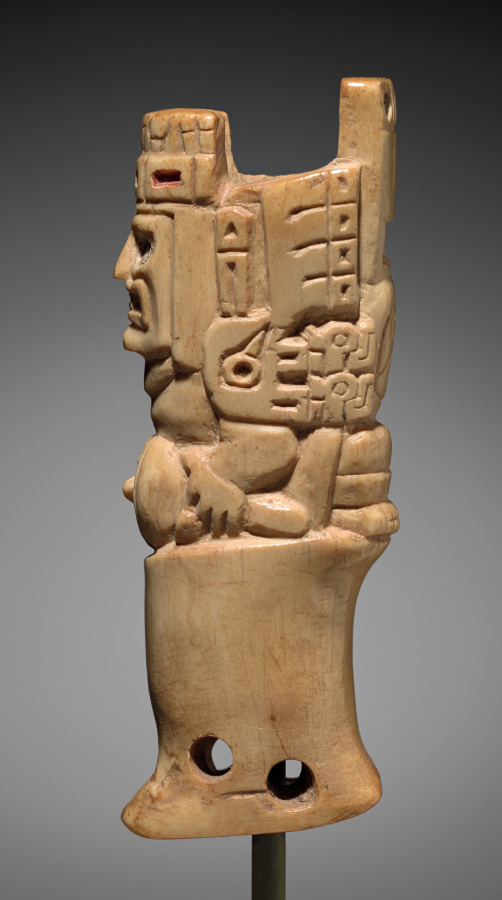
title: Thumb Rest of a Spear Thrower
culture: Andes, Wari people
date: 600–1000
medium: Bone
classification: Implements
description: This object was lashed to a spear thrower, where it served as a thumb rest or grip. The imagery is suited to the use: a supernatural being throttles a human, turning its head to expose its throat to a knife the being holds in one hand. Thus, the scene captures the crucial moment of an offering likely intended to assure the benevolence of divine forces.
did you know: Spear throwers, also called atlatls, use leverage to propel a spear faster and farther.